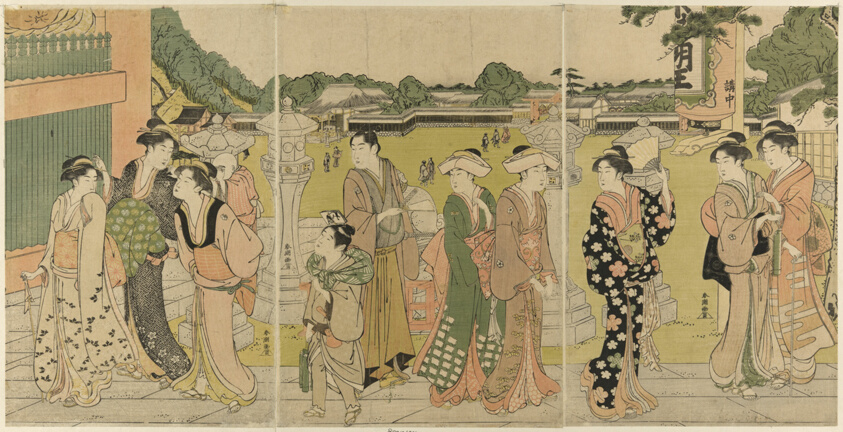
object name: Print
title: Visiting a temple dedicated to Fudo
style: Japanese (culture or style)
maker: Katsukawa Shuncho; Japanese, active c. 1780-1801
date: c. 1780/1801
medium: Color woodblock print; oban triptych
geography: Japan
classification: woodblock print; print; asian art